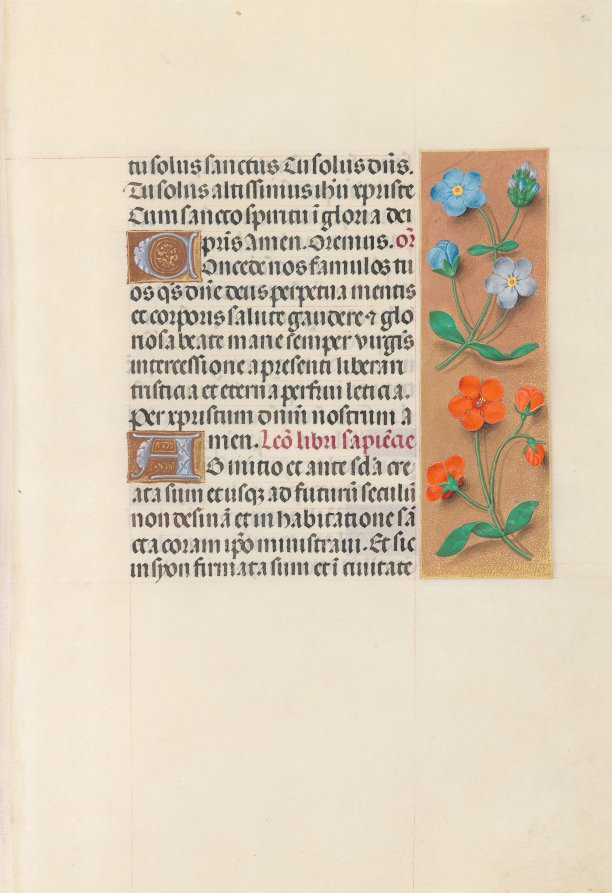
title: Hours of Queen Isabella the Catholic, Queen of Spain: Fol. 90r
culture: Flanders, Ghent and Bruges, late 15th century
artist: Master of the First Prayerbook of Maximillian (Flemish, c. 1444–1519)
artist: and Associates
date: c. 1500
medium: ink, tempera, and gold on vellum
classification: Bound Volume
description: This manuscript was illuminated by a circle of at least five highly organized manuscript painters active in the Flemish cities of Ghent and Bruges. The principal illuminator was Alexander Bening, who painted the majority of the book's miniatures. Manuscripts produced by this circle of artists are renowned for the decoration of their borders, which typically feature a rich variety of realistically-painted flowers, birds, and butterflies. This prayer book, called a book of hours, was intended not for a cleric, but for the private devotions of a lay person-in this case, Isabella the Catholic, Queen of Spain (1451-1504). Isabella's coat of arms embellishes the book's frontispiece. It is unlikely that the book was commissioned by the Queen herself; rather, she probably received it as a diplomatic gift from someone courting her patronage, perhaps Cardinal Francisco Jimenez de Cisneros. A Franciscan friar, Jimenez was dependent upon Isabella for his advancement, first to the post of Queen's confessor in 1492, and then to Archbishop of Toledo in 1495.